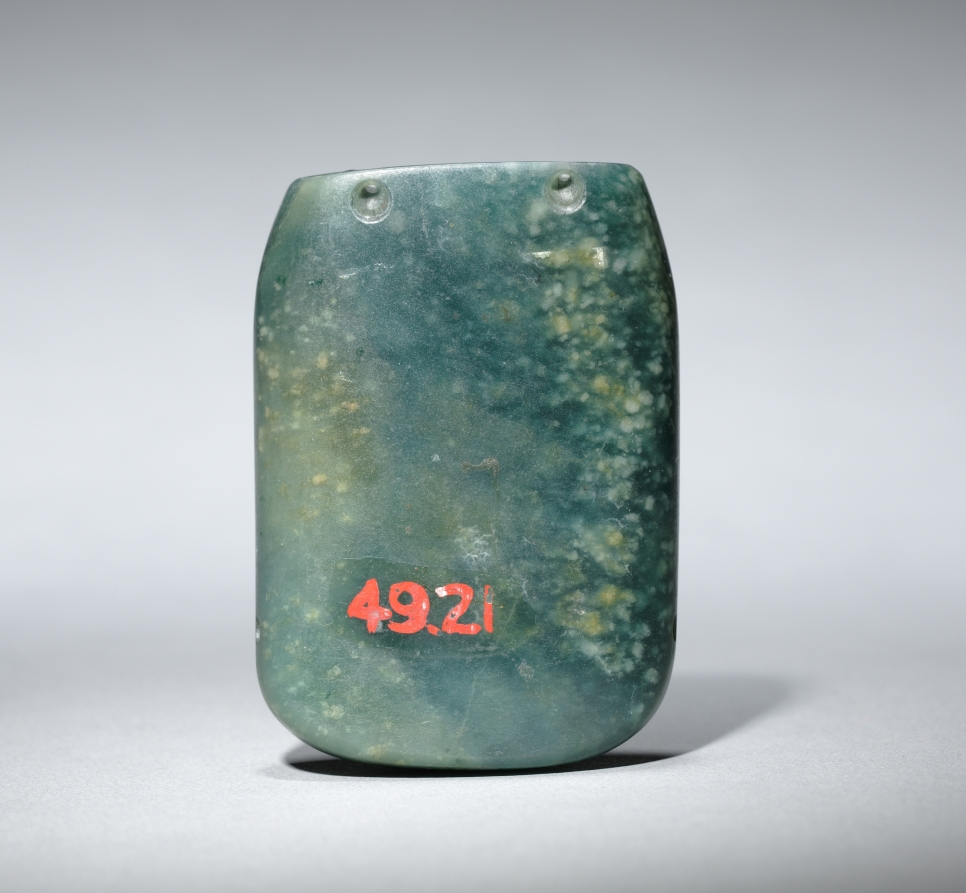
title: Small Mask Ornament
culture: Mesoamerica, Mexico, Olmec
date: c. 900–300 BCE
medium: jadeite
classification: Jade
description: Side and overhead views of a shaft tomb. Photo from Ancient West Mexico, p. 41, The Art Institute of Chicago, 1998